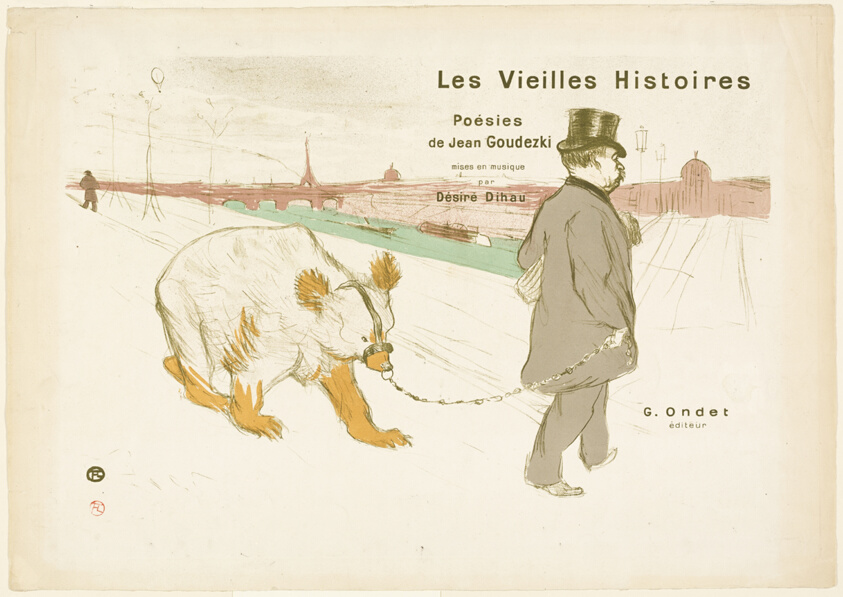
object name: Print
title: Cover and Frontispiece to Les Vieilles Histoires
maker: Henri de Toulouse-Lautrec (French, 1864-1901)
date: 1893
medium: Color lithograph on cream wove paper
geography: France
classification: lithograph; print; prints and drawing